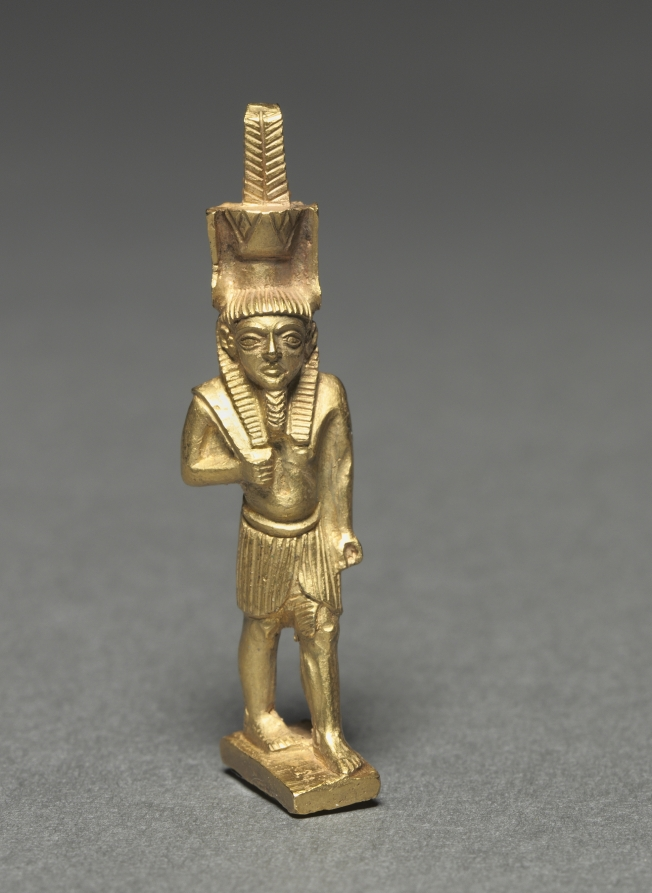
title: Nefertem Amulet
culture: Syro-Phoenicia, Lebanon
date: c. 500 BCE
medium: gold, lost-wax, solid cast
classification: Jewelry